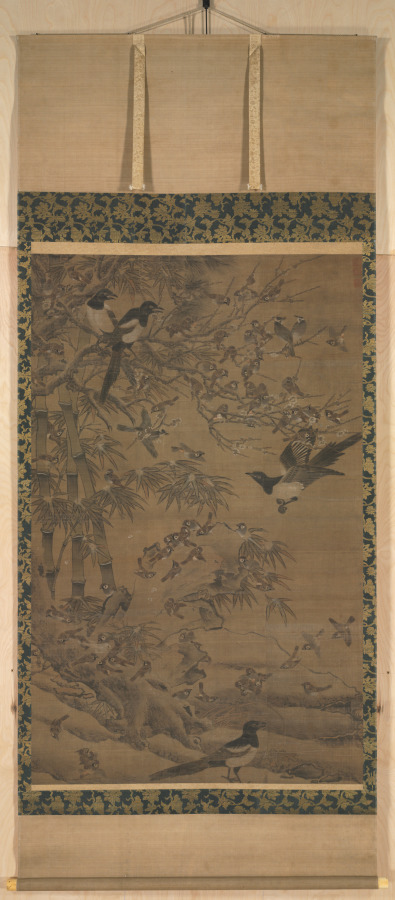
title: A Hundred Birds and the Three Friends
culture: China, Ming dynasty (1368–1644)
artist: Bian Wenjin (Chinese, about 1354–1428)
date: 1400–1425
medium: hanging scroll; ink and color on silk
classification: Painting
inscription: Artist's three seals: Pien yin Ching-chao; Sha-yang shih-chia; Ch'in shu ch'ing-lo.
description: In this hanging scroll birds rest and frolic among pines, bamboo, and flowering plum, plants known as “the three friends.” Due to their endurance in winter, they symbolize perseverance and friendship in adverse times. The naturalistic depiction of the birds refers to the bird-and-flower painting tradition of the Art Academy of the Song dynasty. The painter Bian Wenjin served at the court of the Ming dynasty Yongle Emperor (reigned 1402–24). This painting may have been hung in a private studio or palace hall on appropriate occasions.